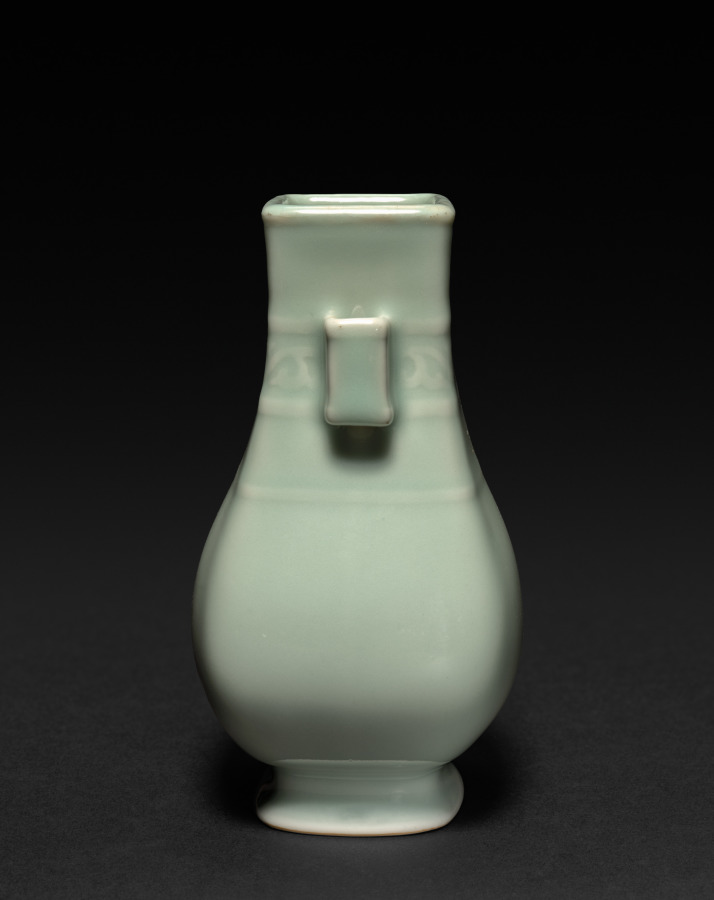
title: Vase in Form of Archaic Hu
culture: China, Jiangxi province, Jingdezhen kilns, Qing dynasty (1644-1911), Qianlong mark and reign (1736-95)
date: 1736–95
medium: porcelain with celadon glaze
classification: Ceramic